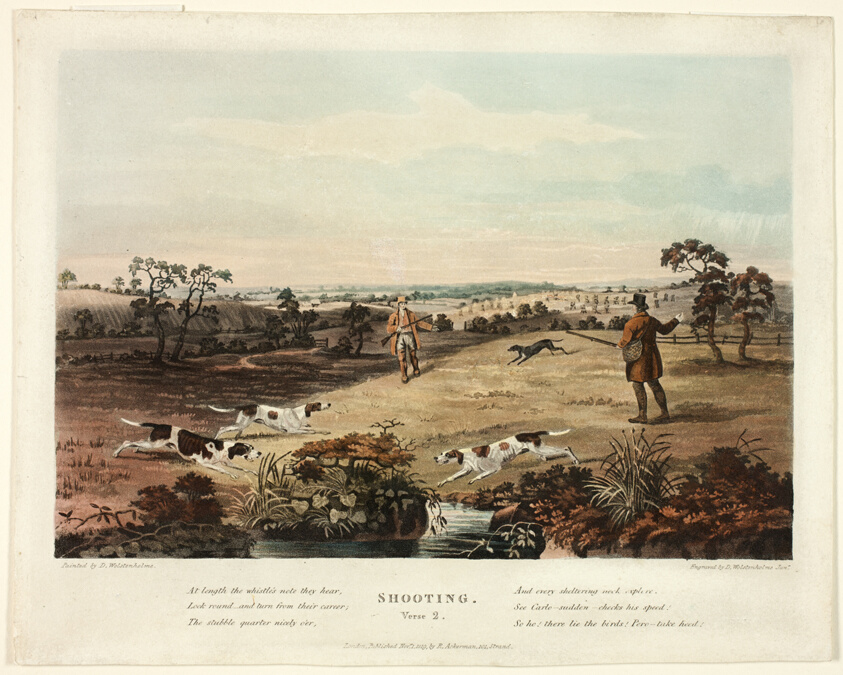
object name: Print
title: Shooting: Verse 2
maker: Thomas Sutherland (English, active c. 1785-1827); after Dean Wolstenholme (English, 1798-1882); published by Rudolph Ackermann (English, born Germany, 1764-1834)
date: 1819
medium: Hand-colored aquatint and etching on ivory wove paper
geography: England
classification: aquatint; print; prints and drawing